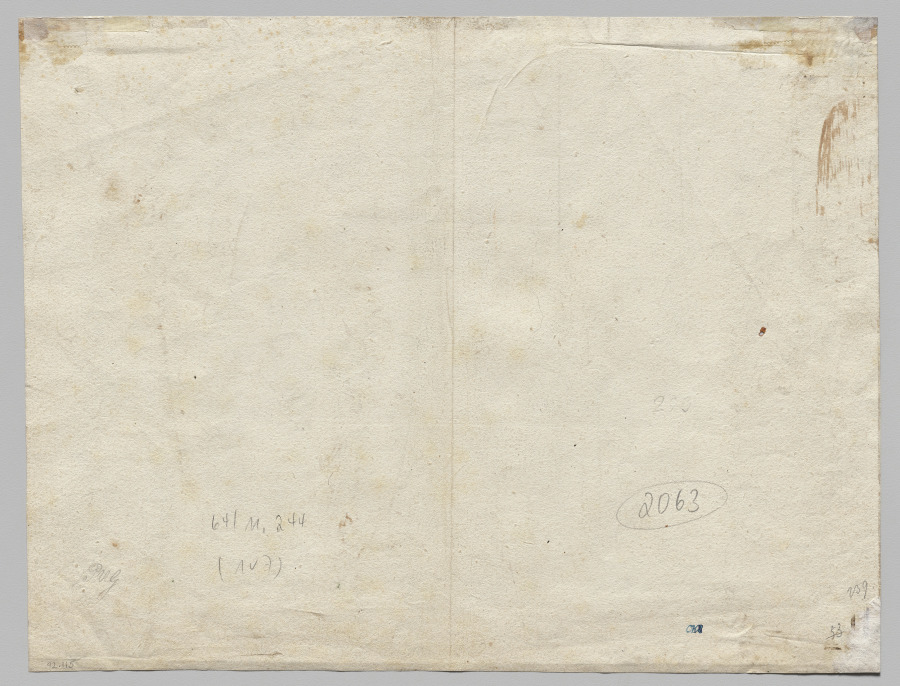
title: The Parable of the Tribute Money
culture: Netherlands, late 16th Century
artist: Master of the Egmont Albums (Netherlandish, 1480-1620)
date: c. 1580–1600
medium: Pen and brown ink, traces of pen and black ink and black chalk, on paper; framing lines in brown ink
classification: Drawing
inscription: falsely signed, lower right, in brown ink: Hans van Aken fecit. [abraded, visible under UV] ; VERSO, right center, in graphite: 259 ; lower left, in graphite: 641 M. 244 / (1V7) ; lower left, in graphite: PMG ; lower right, in graphite: 2063 [circled] ; lower right, in graphite: [illegible] [partially erased] ; lower right, in graphite: [illegible] [partially erased] ; lower right, in graphite: 239. ; lower right, in graphite: 53 [crossed out]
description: The New Testament parable of the tribute money addresses the division between worldly and divine power. Here, the artist depicted Christ in the center of a civic square with one hand pointing toward a king wearing a crown and an ermine robe and the other toward God above. Encouraged by Christ’s words to show each authority its due, the crowd shows deference to both the king and God via facial expression, pose, and gesture. Parables were enduringly popular on prints, stained glass, and decorative objects for their relevance to the issues and choices made by everyday citizens.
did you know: The pose of the kneeling man and the decoration of the door surround in this drawing are both based on details in a woodcut made earlier in the century by the German artist Albrecht Dürer.